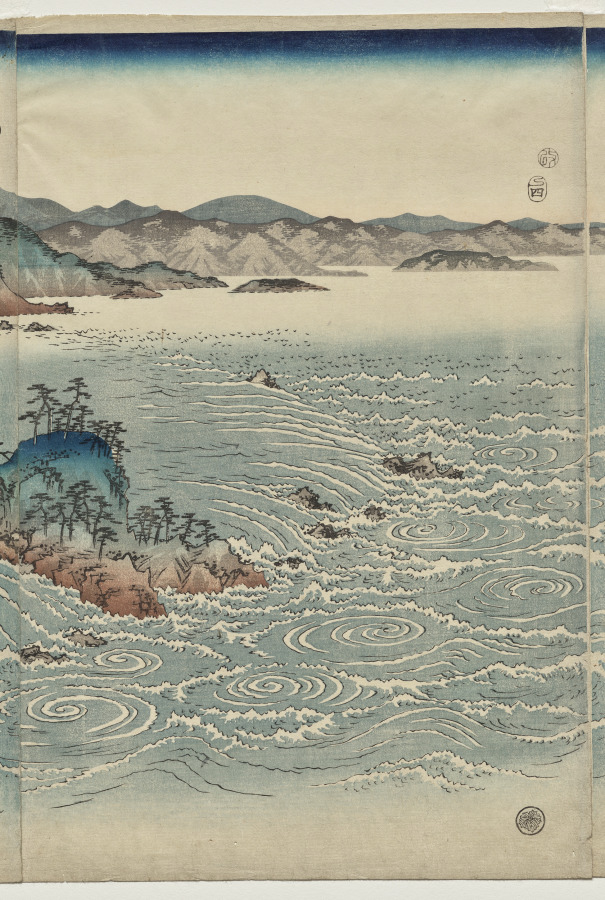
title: The Whirlpools of Awa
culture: Japan, Edo period (1615–1868)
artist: Utagawa Hiroshige (Japanese, 1797–1858)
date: 1857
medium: One of a triptych of color woodblock prints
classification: Print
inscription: Signature: Hiroshige hitsu (on left panel) Publisher: Okazawaya Taheiji (emblem) Censorship Seal: aratame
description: Late in his career, Hiroshige explored the poetic theme of setsugekka, “snow, moon, and flowers,” in a set of three triptychs. The swirling whirlpools at Awa would remind the viewer of flowers.